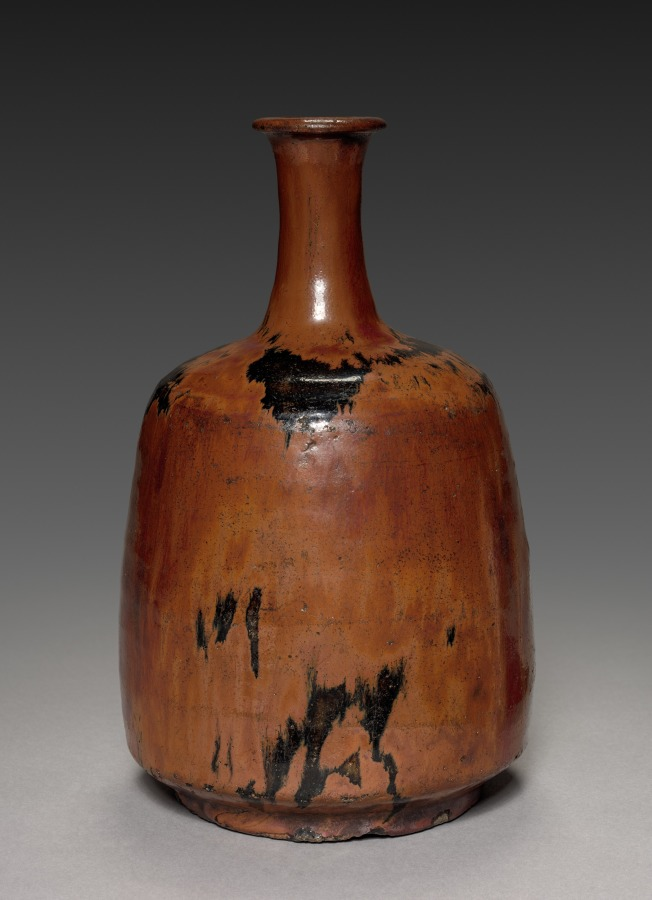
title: Bottle Vase: Seto Ware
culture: Japan, Momoyama period (1573-1615) to Edo period (1615-1858)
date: 1600–1650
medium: slip glazed stoneware (Mino or Seto ware)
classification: Ceramic